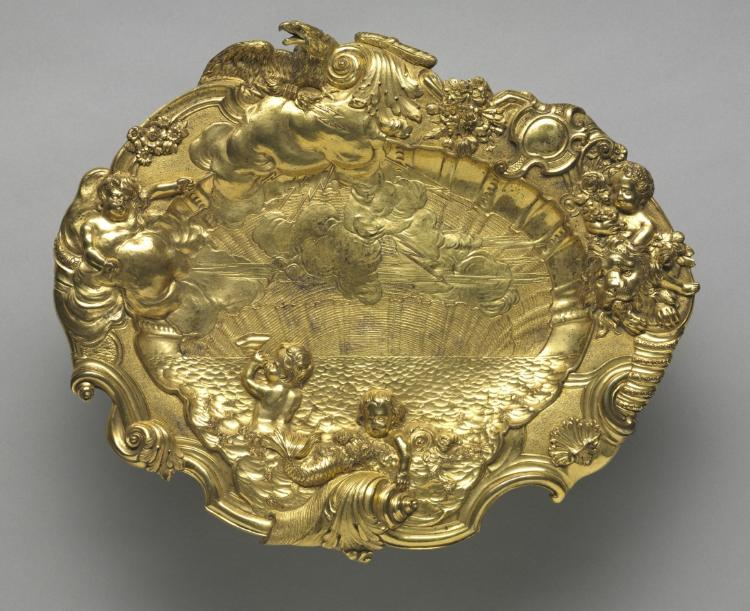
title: Basin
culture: England or Germany, 18th century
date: c. 1725–40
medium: gilt bronze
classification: Metalwork